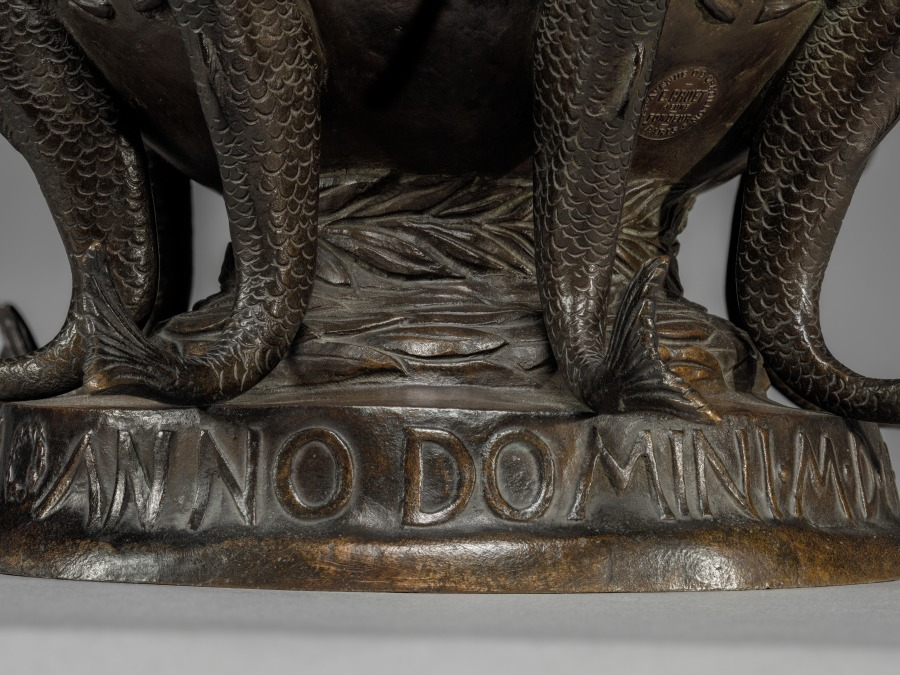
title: Pan of Rohallion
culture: America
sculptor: Frederick William MacMonnies (American, 1863–1937)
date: 1890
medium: bronze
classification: Sculpture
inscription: Signed on globe: Frederick MacMonnies, Paris 1890. © 1894. Inscribed around base: TO PAN OF ROHALLION ANNO DOMINI MDCCCLXL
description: Rohallion in the title refers to the name of an estate in New Jersey, whose owner commissioned MacMonnies to create a large fountain of this design for a garden pool. Later, the artist made several smaller versions, such as this example. Here, the ancient Greek god Pan plays his musical pipes while standing on an orb supported by fish.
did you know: The character of Peter Pan, including his flute playing, references the Greek god Pan.